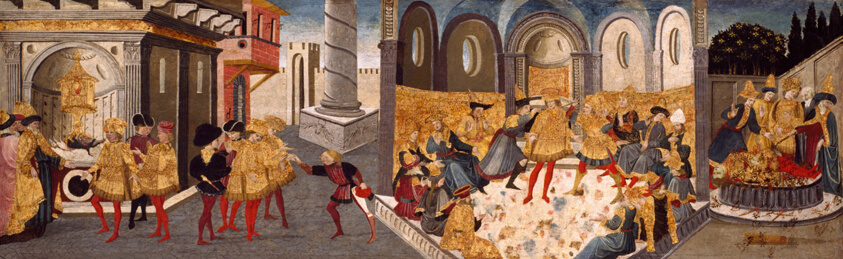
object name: Painting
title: The Assassination and Funeral of Julius Caesar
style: 15th century, Renaissance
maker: Workshop of Apollonio di Giovanni (Italian, 1415/17-1465); Marco del Buono Giamberti (Italian, 1403-1489)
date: 1455/60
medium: Tempera on panel, transferred to canvas mounted on pressed hardboard and cradled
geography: Italy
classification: painting; Italian; paint; tempera; european painting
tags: Roman, interiors, funerals, Burial, violence, history, historical figures